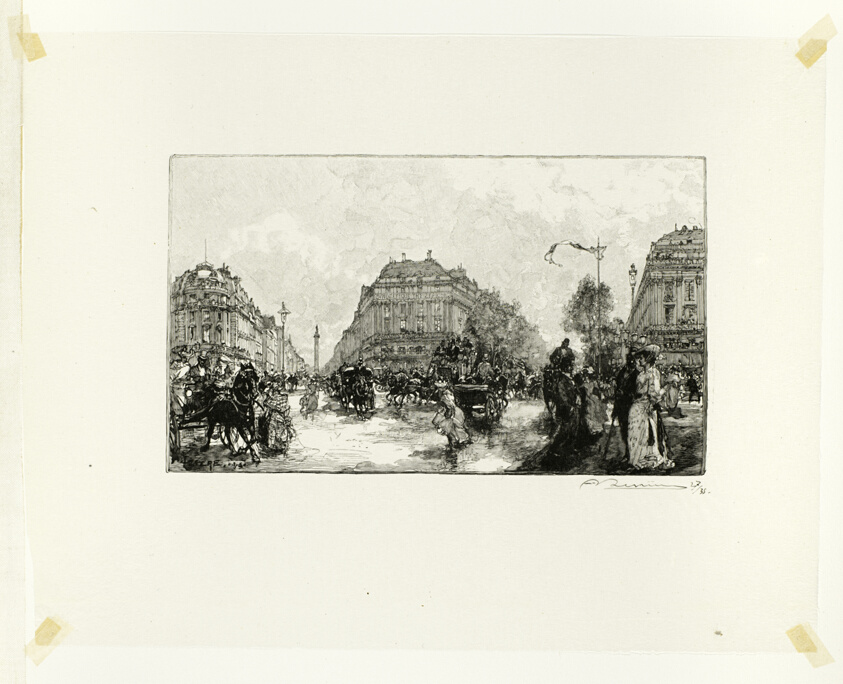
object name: Print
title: Place de l'Opéra, plate seventeen from Le Long de la Seine et des Boulevards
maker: Louis Auguste Lepère (French, 1849-1918); published by A. Desmoulins (French, active c. 1908-1910)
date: 1890, published 1910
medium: Wood engraving in black on cream Japanese tissue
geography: France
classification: wood engraving; paper; print; prints and drawing